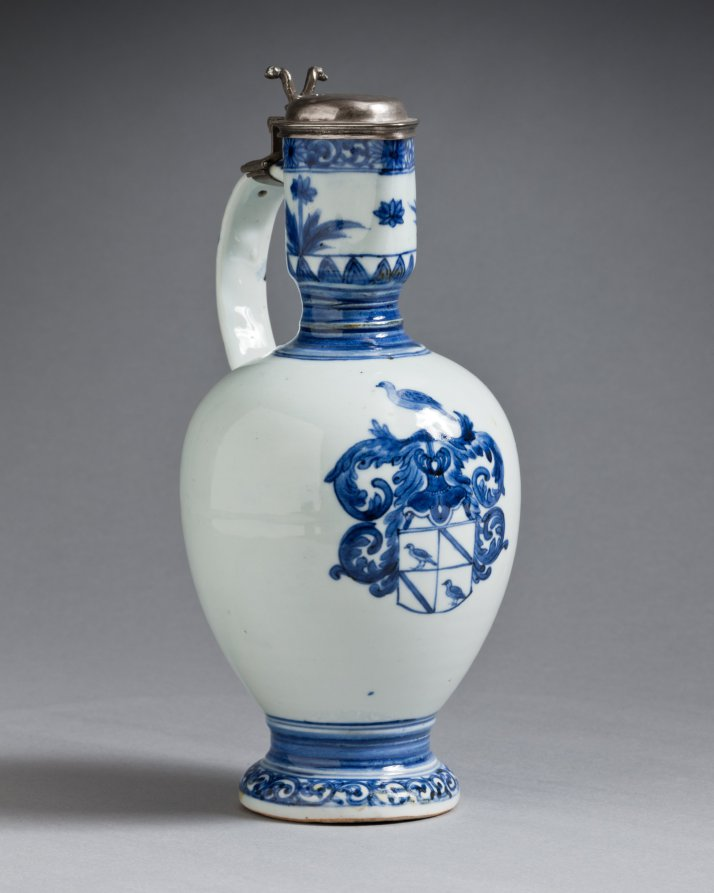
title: Jug with Silver Mounts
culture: Japan, Edo period (1615–1868)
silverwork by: Barent van Leeuwen (Dutch, 1637–1682)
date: c. 1662–76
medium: porcelain with underglaze blue decoration and silver mounts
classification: Ceramic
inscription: [on silver]: town mark for Amsterdam; lion rampant crowned (alloy mark for 0-934 silver); d (date letter for 1666), maker's mark of Barent van Leeuwen.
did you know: The coat of arms on this jug are those of the Valckenier family, active in the Dutch East India Company.